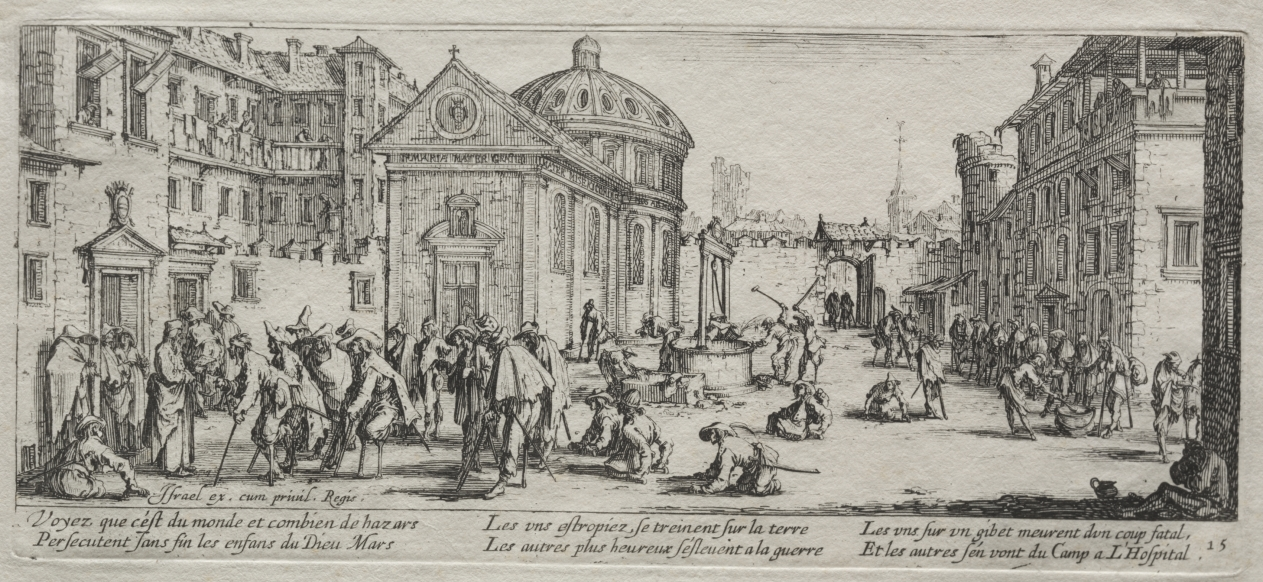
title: The Large Miseries of War: The Hospital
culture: France, 17th century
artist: Jacques Callot (French, 1592–1635)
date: 1633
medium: etching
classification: Print